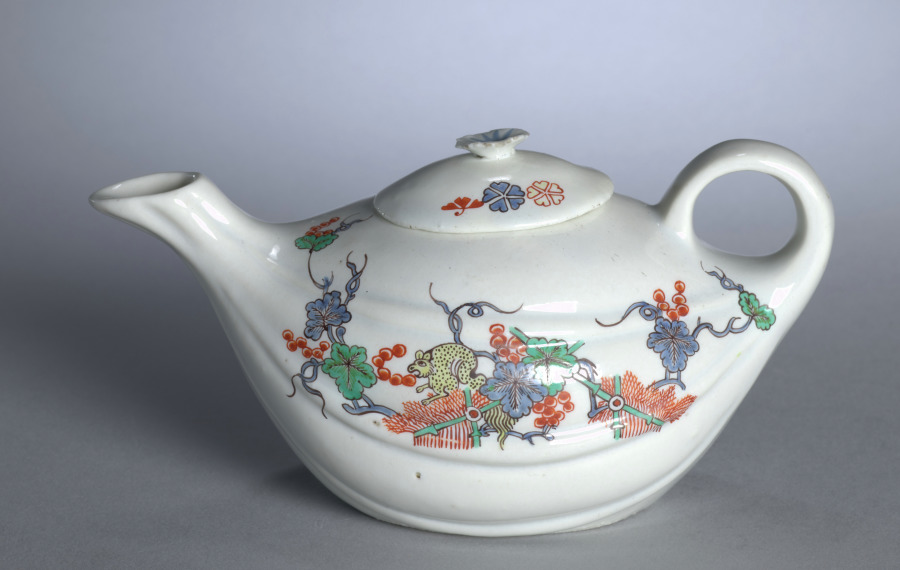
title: Teapot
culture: France, Chantilly, 18th century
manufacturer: Chantilly Porcelain Factory (French)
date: c. 1730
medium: soft-paste porcelain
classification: Ceramic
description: The pieces composing this individual tea set are entirely typical of Chantilly soft-paste porcelain in the Kakiemon style. Both the form and decoration of these pieces were inspired by Japanese prototypes. The use of knobs in the form of trumpet-shaped blossoms is characteristic of Chantilly wares.